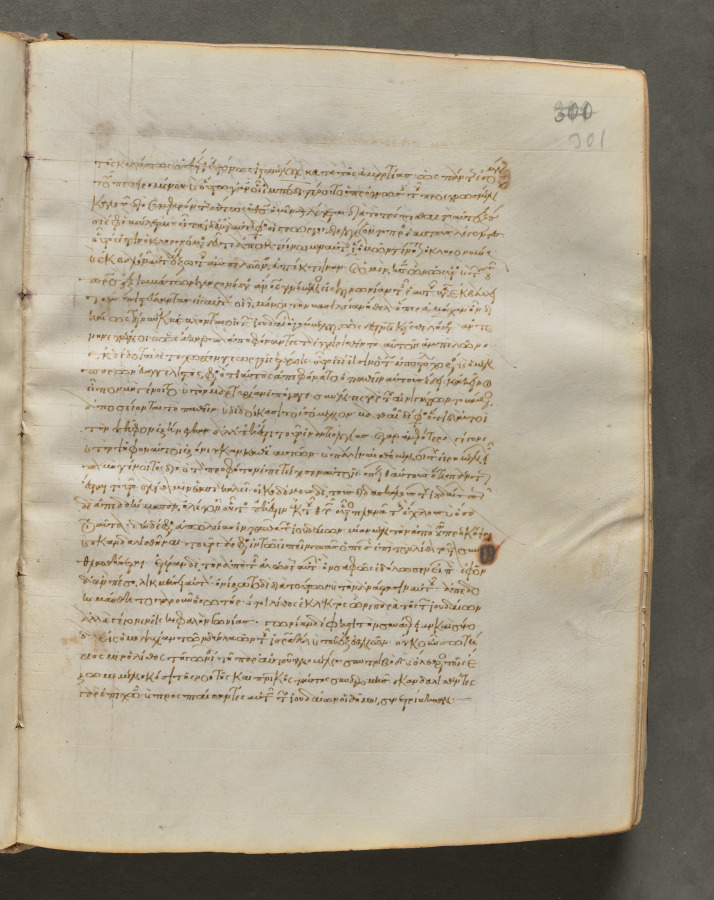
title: Text, folio 301 (recto), from a Gospel Book with Commentaries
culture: Byzantium, Constantinople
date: c. 1000–1100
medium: ink, tempera, and gold on vellum; leather binding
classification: Bound Volume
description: Each of the four gospels in this book opens on a page with brilliantly illuminated borders depicting the author of the text as well as birds—principally peacocks, symbols of the immortality of the soul—and fountains, representing the fountain of life and the salvation of the soul. This volume consists of 428 leaves with texts in Greek. Its level of sophistication suggests that it was probably written and decorated in a monastery in Constantinople.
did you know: Gospel books were carried in procession through Byzantine churches.